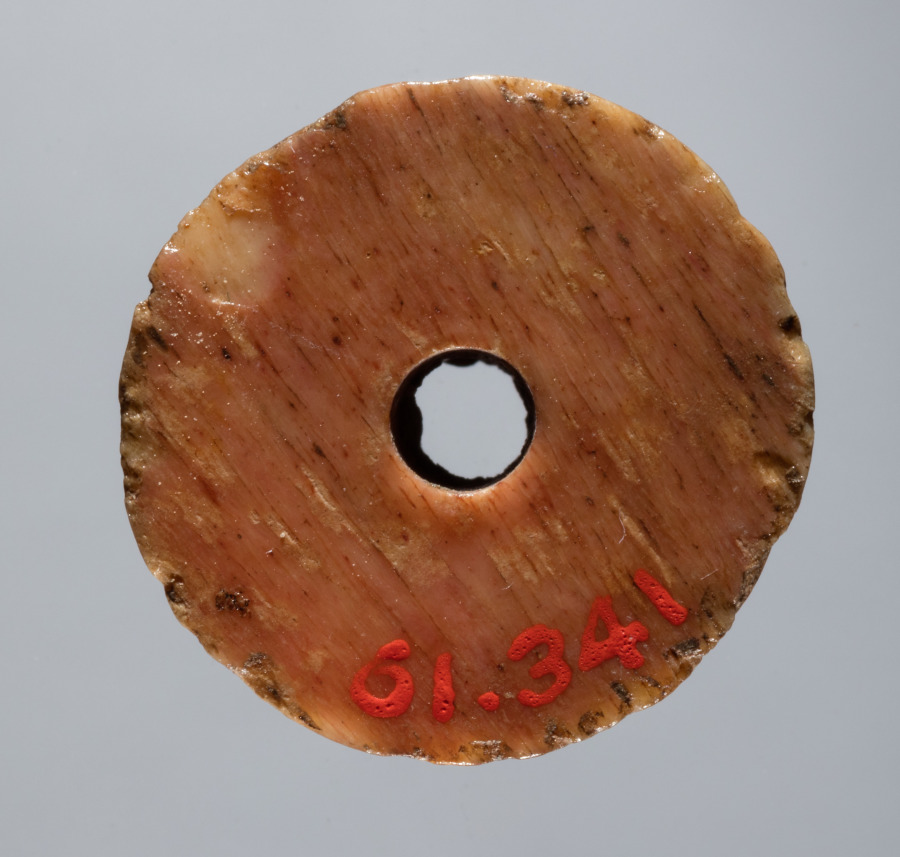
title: Spindle Whorl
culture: Iran, early Islamic period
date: 700s - 900s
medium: bone, incised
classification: Spindle Whorl